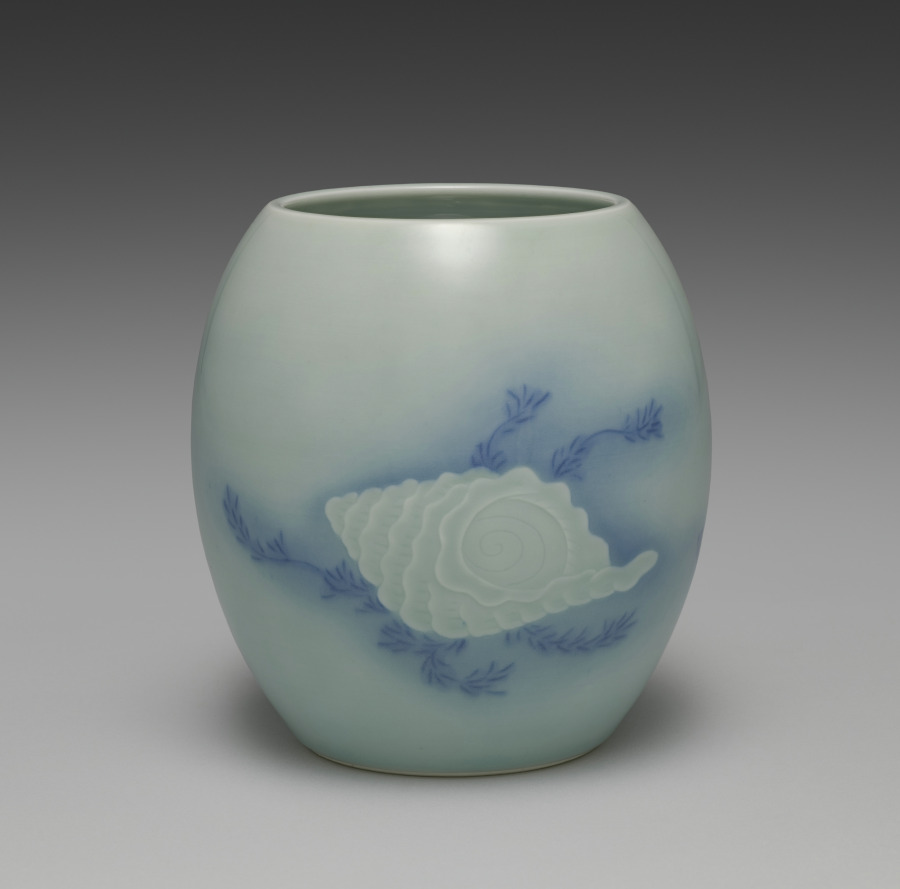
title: Water Container with Shell and Seaweed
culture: Japan, Meiji period (1868–1912) or Taishō period (1912–26)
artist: Seifū Yohei IV (Japanese, 1872–1951)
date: 1914–46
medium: Porcelain with underglaze blue, blue glaze and molded design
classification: Ceramic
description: Yohei IV chose an aquatic theme for this mizusashi. He applied clay to the surface and molded the shape of a large conch on one side and, on the other, a clam and a scallop. The finer details he incised into the surface of his low-relief shapes. He then painted seaweed as though it were coming out from behind the sea creatures, and he further set off the animals using a masking technique with a gradated blue surround. Finally, he applied a translucent blue glaze, identified on the box as mizusai, over the entire body of the vessel. The resulting effect is that one imagines having descended through the water to the ocean floor.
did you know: A mizusashi, water container, is an essential utensil for a tea ceremony.